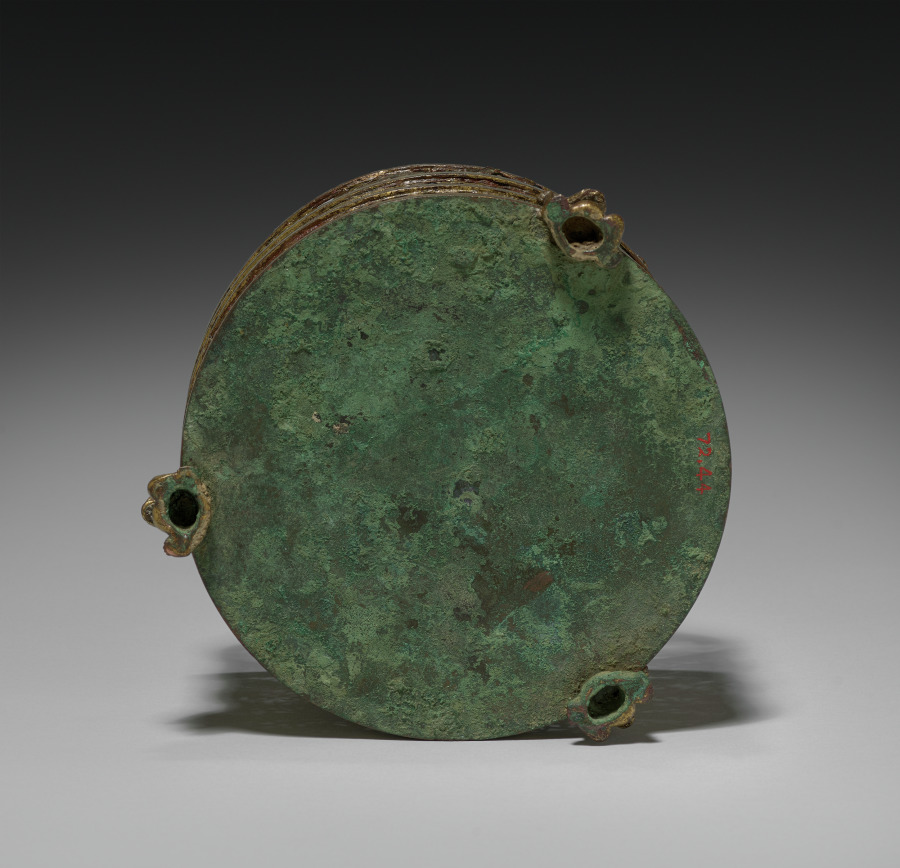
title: Cylindrical Container with Cover (Lian)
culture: China, Han dynasty (202 BCE–220 CE)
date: 100 BCE–100 CE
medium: gilt bronze with openwork and chased designs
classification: Metalwork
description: This magnificent gilded bronze vessel with openwork decoration shows all kinds of fabulous creatures, real and imaginary, chasing each other among swirling scrolls. There is an emphasis on the unbroken rhythms of movement, rather than the ferocity of animals in combat. Cylindrical bronze vessels in this shape, called lian, were often used as cosmetic boxes.